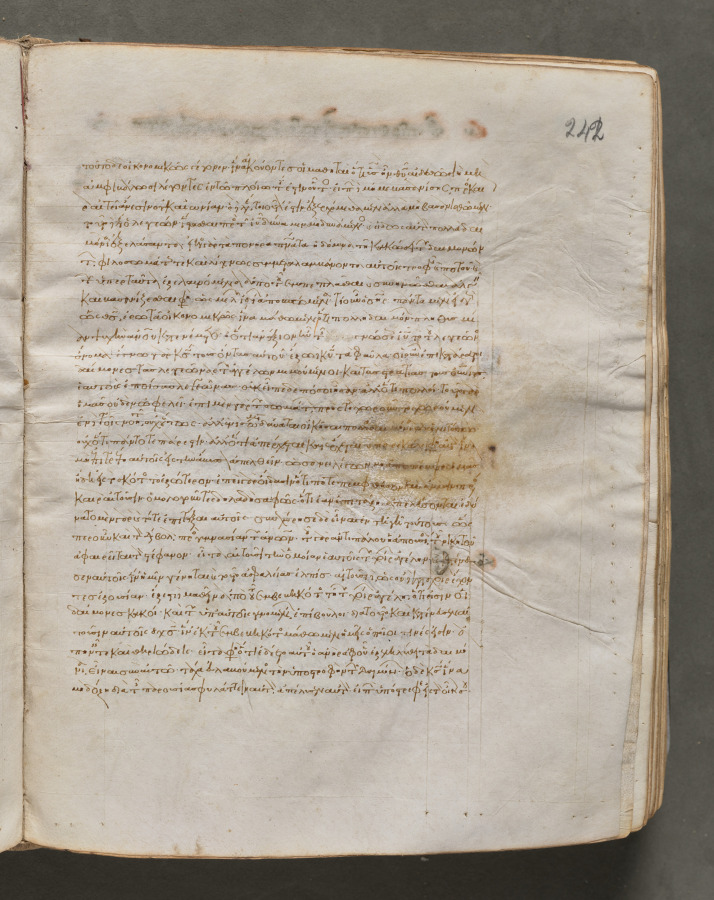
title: Text, folio 242 (recto), from a Gospel Book with Commentaries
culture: Byzantium, Constantinople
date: c. 1000–1100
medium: ink, tempera, and gold on vellum; leather binding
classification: Bound Volume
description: Each of the four gospels in this book opens on a page with brilliantly illuminated borders depicting the author of the text as well as birds—principally peacocks, symbols of the immortality of the soul—and fountains, representing the fountain of life and the salvation of the soul. This volume consists of 428 leaves with texts in Greek. Its level of sophistication suggests that it was probably written and decorated in a monastery in Constantinople.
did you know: Gospel books were carried in procession through Byzantine churches.